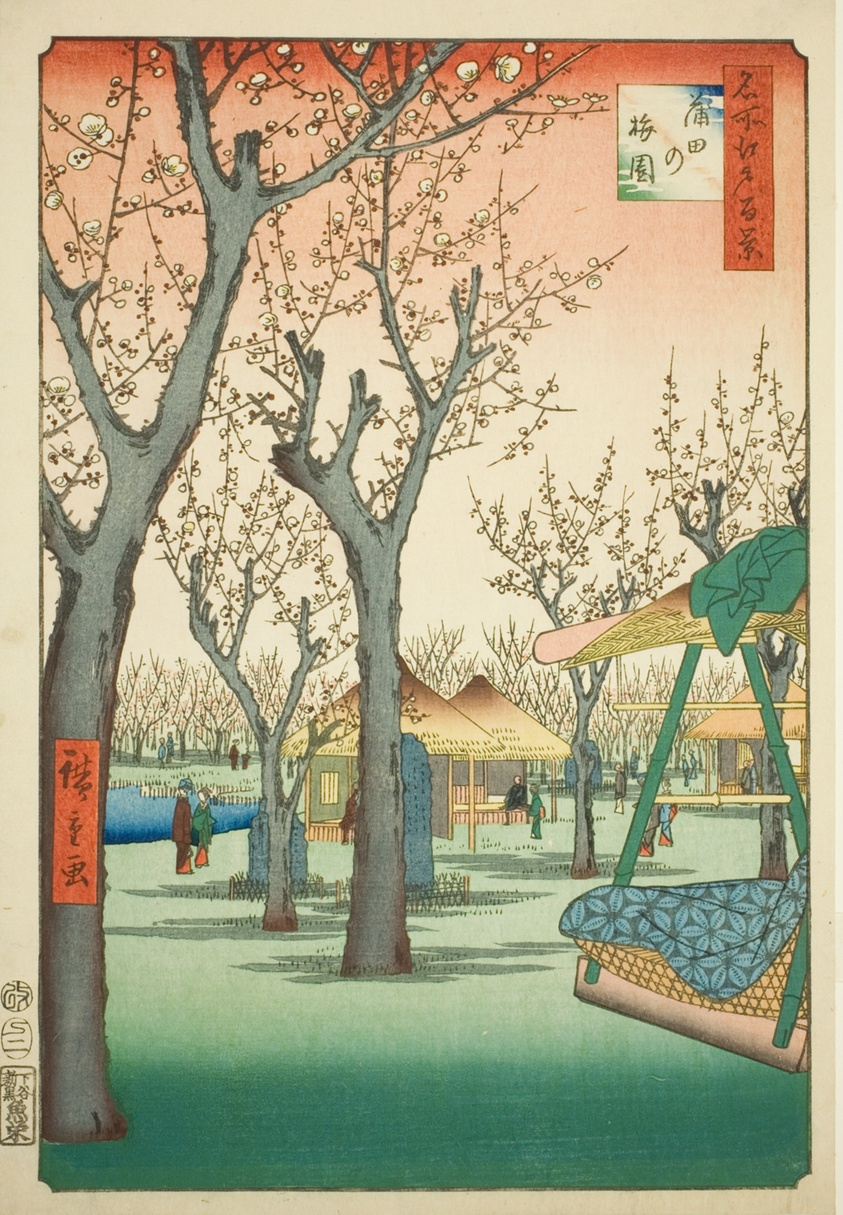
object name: Print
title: The Plum Orchard at Kamata (Kamata no umezono), No.27 from the series "One Hundred Famous Views of Edo (Meisho Edo hyakkei)"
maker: Utagawa Hiroshige (Japanese, 1797-1858)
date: 1857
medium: Color woodblock print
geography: Japan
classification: woodblock print; print; asian art